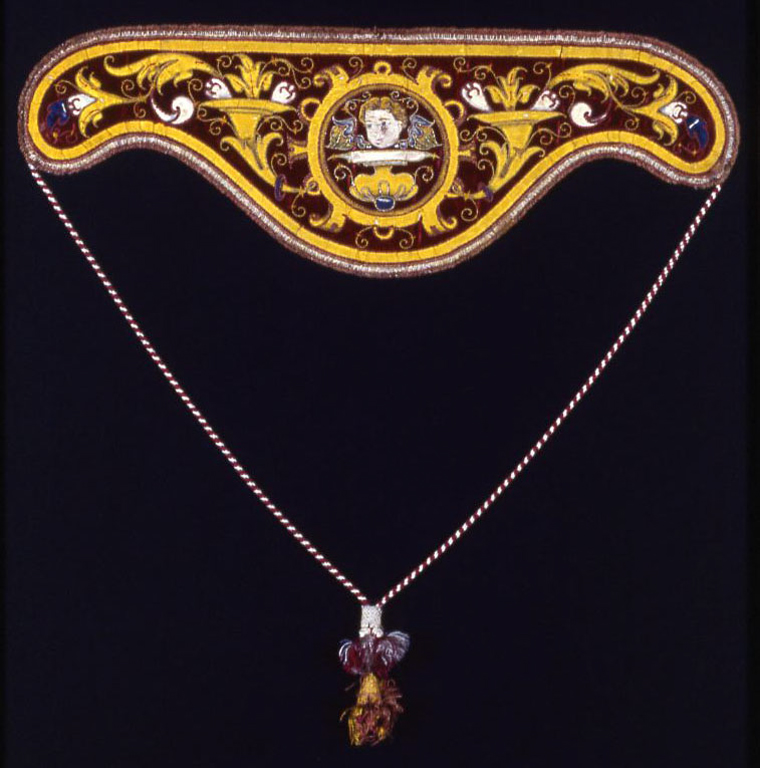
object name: Textile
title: Amice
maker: Spain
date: 17th century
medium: Silk, warp-float faced 3:1 broken warp chevron twill weave with supplementary pile warps forming cut solid velvet; appliquéd with warp-float faced 7:1 satin weaves; painted; embroidered with silk, gilt-metal-strip-wrapped silk, and metal wire in split stitches; laid work and couching; edged with braid of silk and gilt-metal-strip-wrapped silk, plain weave with silk, gilt-metal-strip-wrapped silk, plain weave with supplementary patterning wefts and extended weft uncut fringe; with silk and gilt-metal-strip-wrapped silk, square braided, wrapped and knotted cords and silk, gilt-metal-strip-wrapped silk, square braided, wrapped, knotted and fringed tassels worked over cotton core; underlined with linen and sisal, plain weaves; lined with linen, plain weave; glazed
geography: Spain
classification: textile; needlework (visual works); liturgical; costume